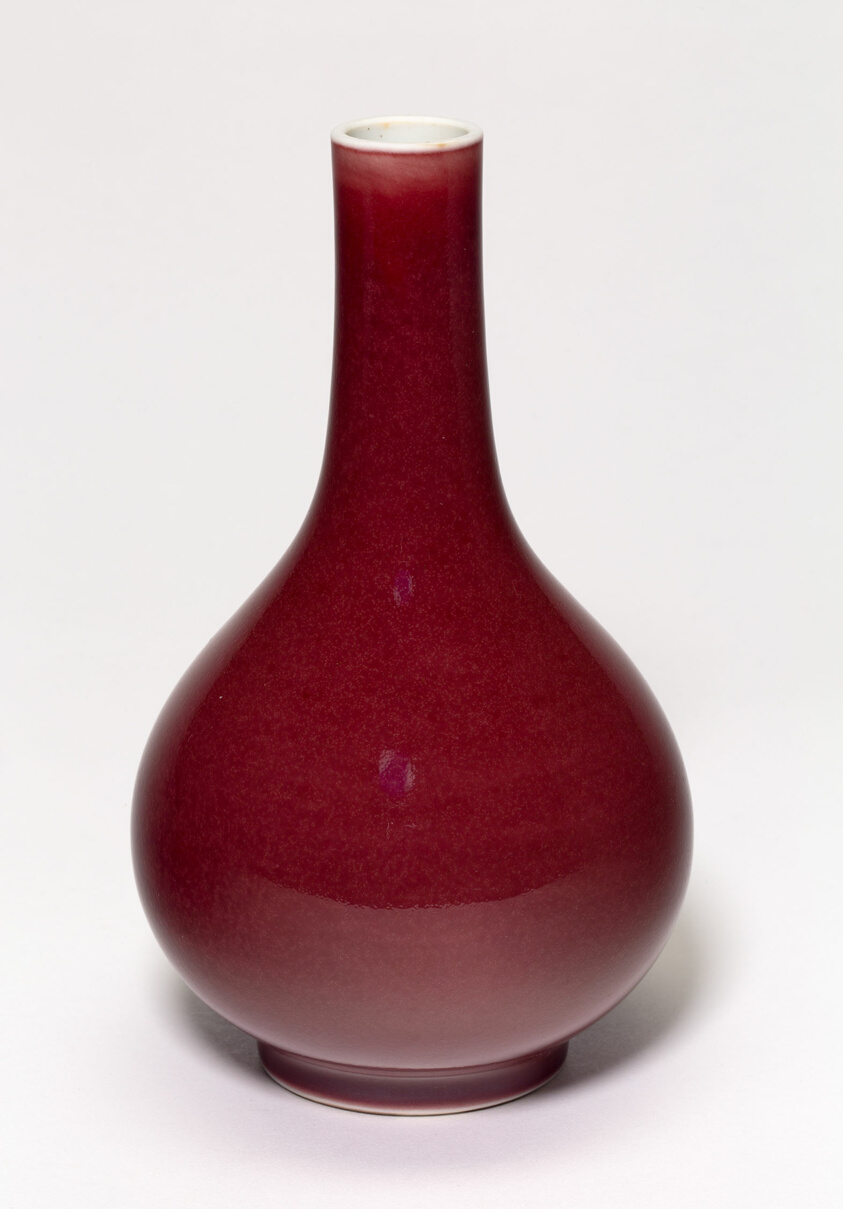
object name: Vessel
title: Red-Glazed Bottle Vase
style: Chinese (culture or style)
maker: China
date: Qing dynasty (1644–1911), Yongzheng period (1723–1735)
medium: Porcelain with copper red peachbloom glaze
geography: China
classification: vase; porcelain; vessel; asian art; ceramics